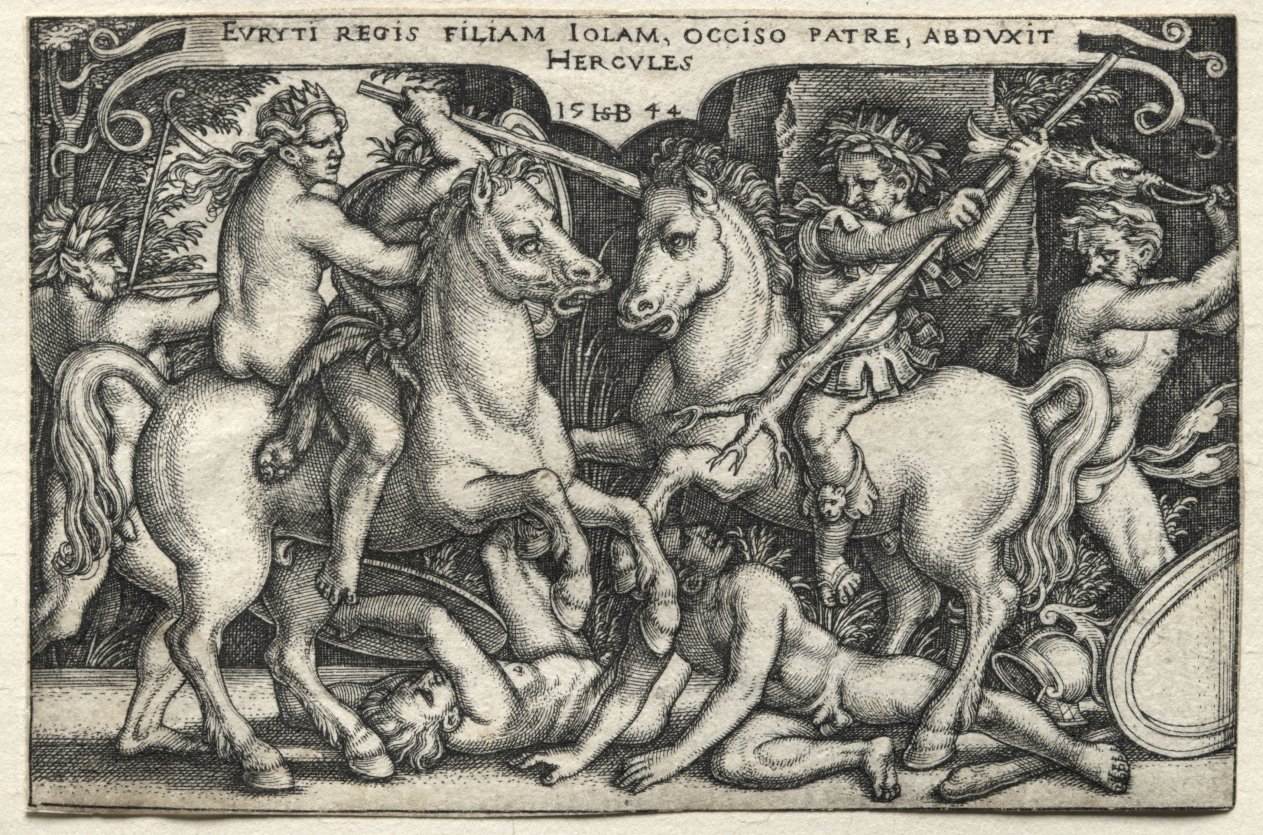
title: The Labors of Hercules: Hercules Abducting Iole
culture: Germany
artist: Hans Sebald Beham (German, 1500–1550)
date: 1544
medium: engraving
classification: Print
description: Hercules avenges an old insult by killing King Eurytus and his sons, and abducting his daughter, Iole. Years before, Eurytus had promised Iole to anyone who could beat him at archery. When he lost the contest to Hercules, the king cheated Hercules out of his rightful prize. Beham was one of several German printmakers referred to today as the “Little Masters.” They established their artistic prowess by engraving remarkably small prints, appealing to collectors fascinated with miniature objects and curiosities.